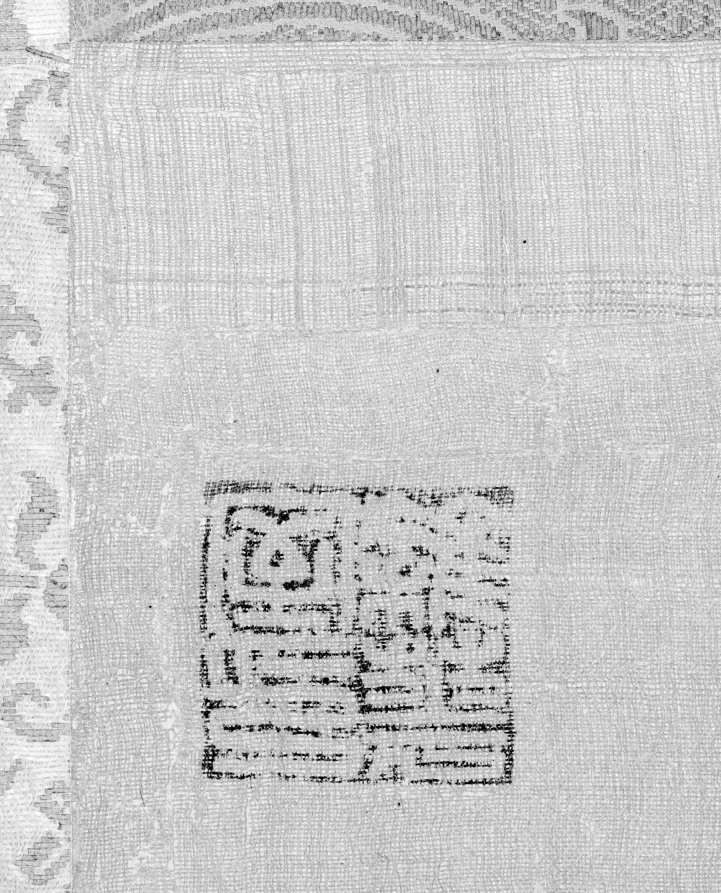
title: Dragon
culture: China, Southern Song dynasty (1127-1279)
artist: Fachang Muqi (Chinese, 1220–1280)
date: c. 1250–79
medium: Hanging scroll; ink on silk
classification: Painting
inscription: 道有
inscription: 雜華室印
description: The dragon and tiger are tied to the philosophical concept of yin and yang, which describes opposite but complementary forces. The dragon occupies a tiered background of waves and mist. Its luminous head emerges from the darker passages, and its narrow twisting body is serpent-like. By contrast, the close-up view of the tiger emphasizes its bulk. The tiger bends its head to lick its paw while its tail curls in the foreground. In their original Chan Buddhist context, this pair of scrolls likely flanked a central image, like the Bodhisattva Guanyin. The silk has darkened over the centuries, and the slight reddish shading in the tiger’s tongue and nose has faded.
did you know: Fachang Muqi was a Chinese Chan Buddhist monk and painter.